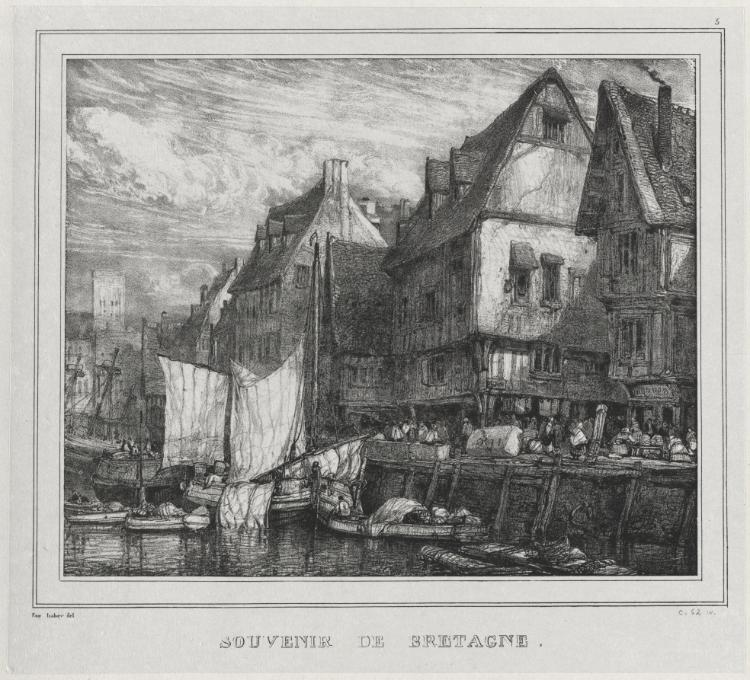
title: Souvenirs: Souvenir of Brittany, Plate 5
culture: France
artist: Eugène Isabey (French, 1803–1886)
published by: V. Morlot and McLean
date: 1832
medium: lithograph on chine collé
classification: Print